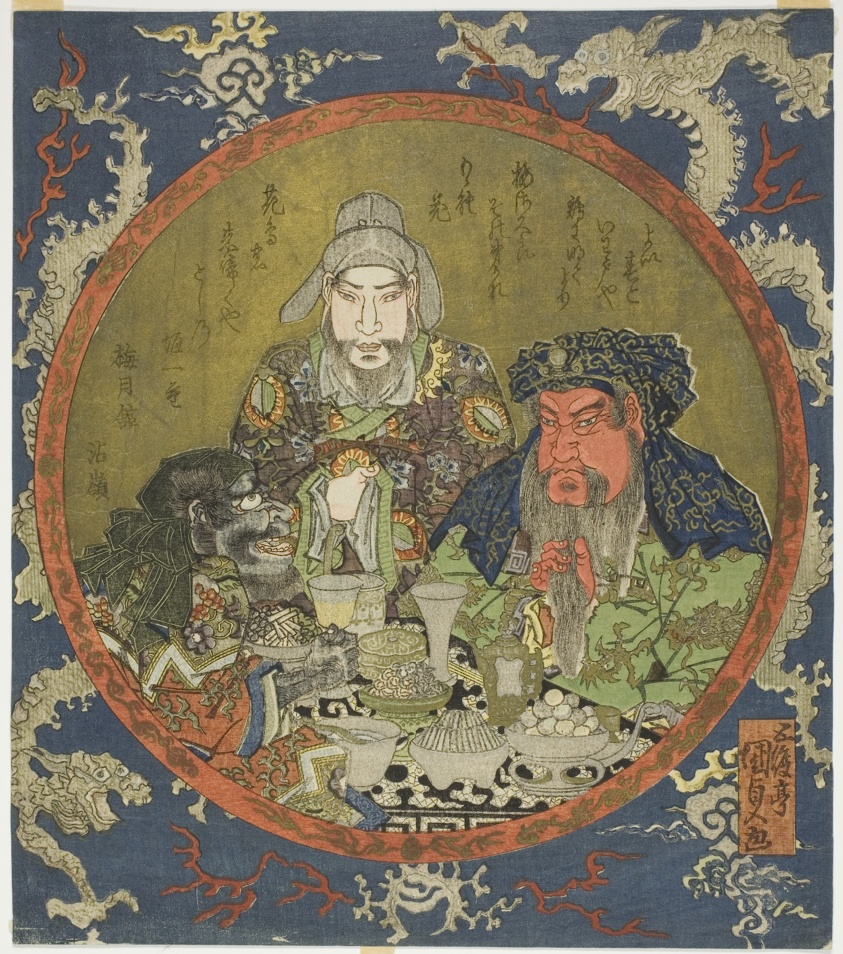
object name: Print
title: Guan Yu, Liu Bei, and Zhang Fei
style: Japanese (culture or style)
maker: Utagawa Kunisada I (Toyokuni III) (Japanese, 1786-1864)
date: 1825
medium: Color woodblock print; shikishiban, surimono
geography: Japan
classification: woodblock print; print; asian art